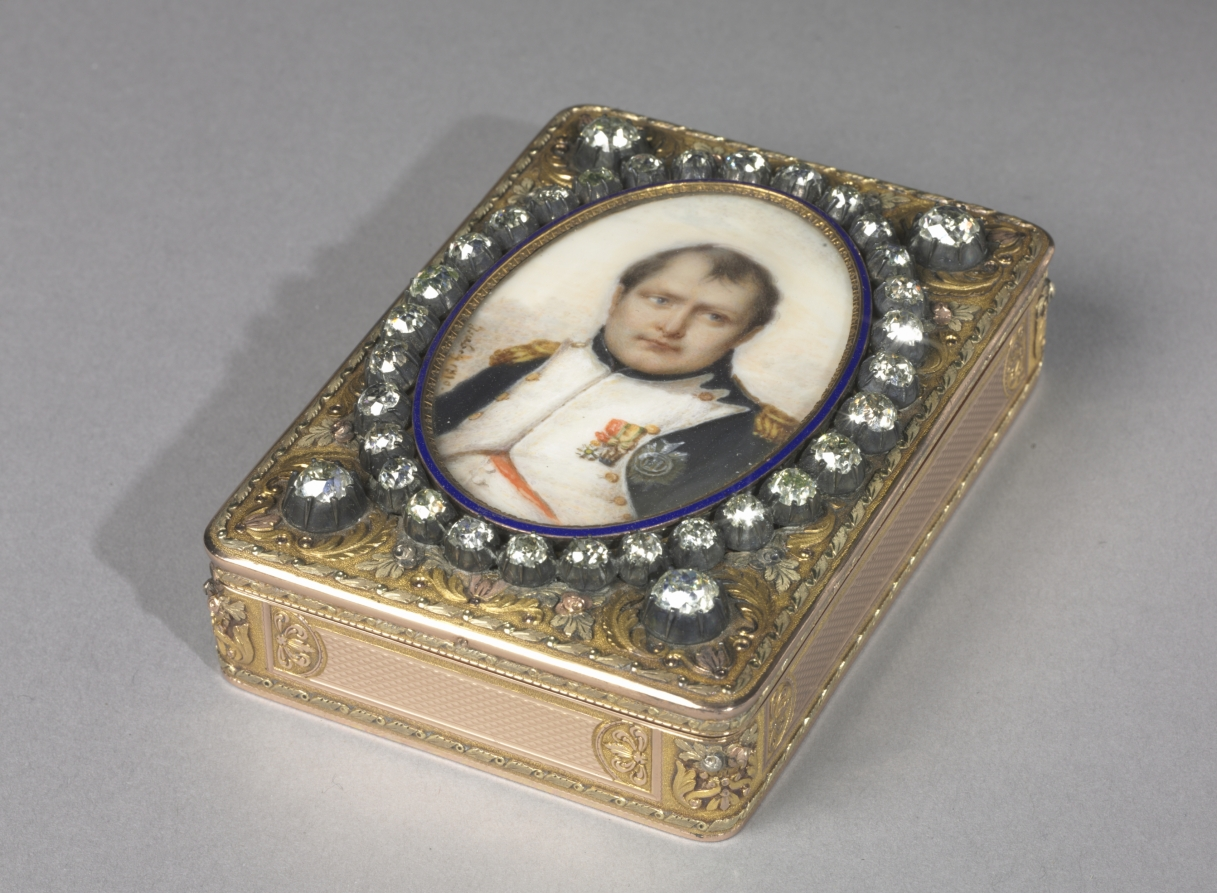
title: Portrait of Napoleon I, Emperor of the French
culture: Box: Switzerland; miniature: France, 19th century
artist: Jean-Baptiste Isabey (French, 1767–1855)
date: 1810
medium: watercolor on ivory in a Swiss gold box with diamonds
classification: Miscellaneous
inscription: inscribed inside cover: "Précieux souvenir de reconnaissance donné par l'Empr. Napoléon 1er à L'Abbé Bonavita, son Aumônier."